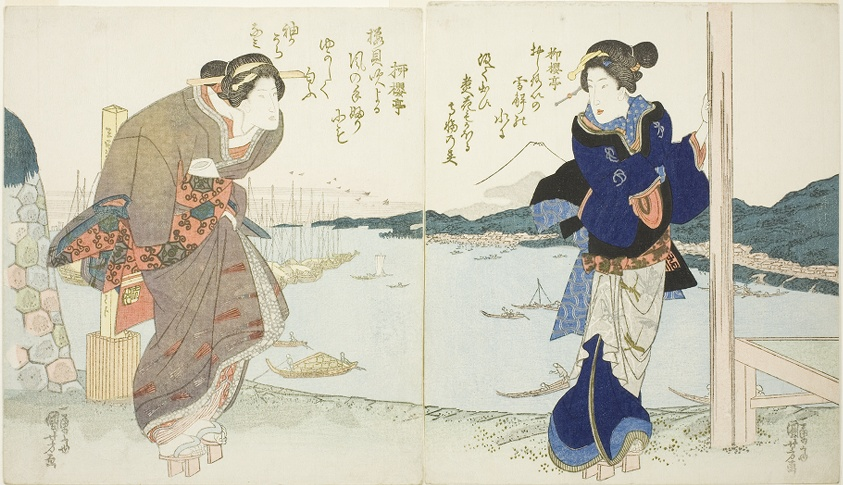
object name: Print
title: Two women by a tea house in Takanawa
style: Japanese (culture or style)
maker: Utagawa Kuniyoshi (Japanese, 1787-1861)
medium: Color woodblock print; shikishiban diptych, surimono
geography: Japan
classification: print; asian art